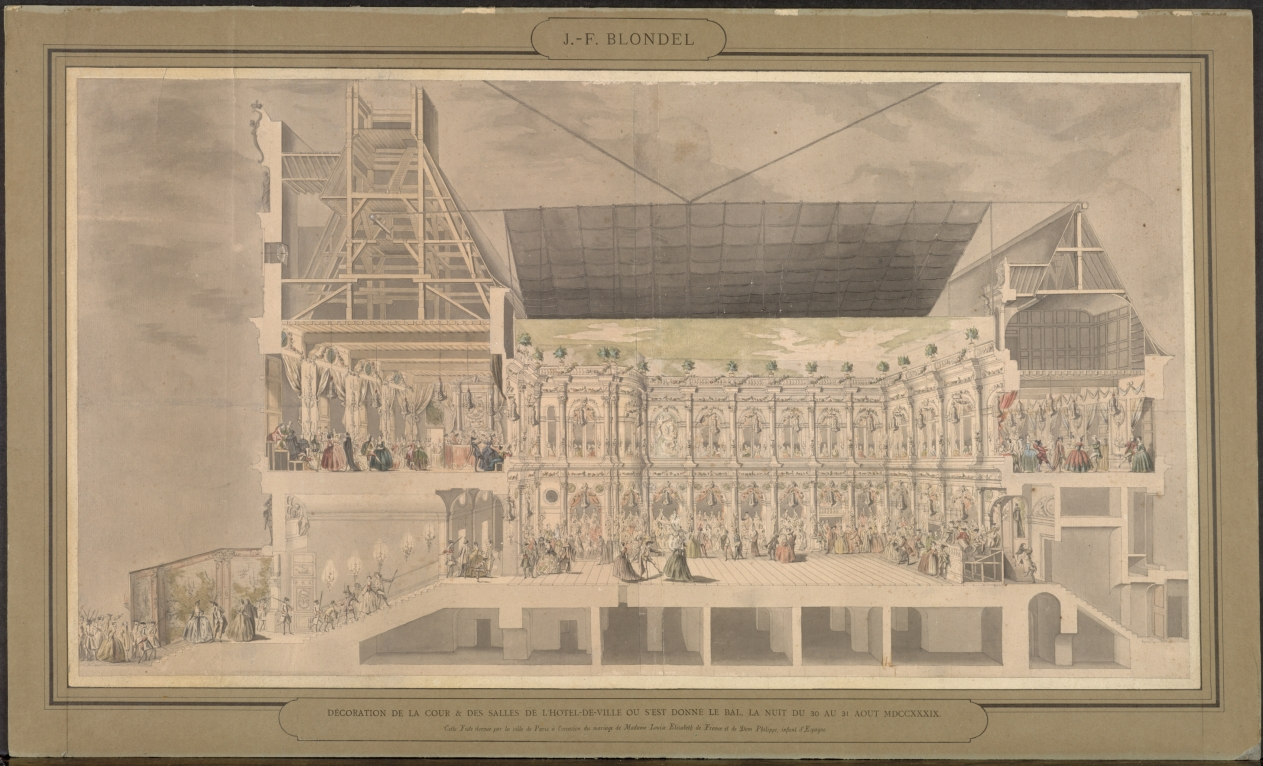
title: Cross Section of the Hôtel de Ville Seen in Perspective Showing the Decoration and Illumination of the Courtyard and Rooms Created on the Occasion of the Ball Given the Night of August 30 and 31, 1739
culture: France, 18th century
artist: Jacques-François Blondel (French, 1705–1744)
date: 1739–1740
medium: pen and black ink, brush and gray wash, and watercolor with gouache, over graphite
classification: Drawing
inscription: upper center in black: J. F. BLONDEL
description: This cross-section of a building allows a unique view into a French royal wedding. The partiers are dressed in costume and dance in the Parisian town hall. No expense was spared in the lavish celebration, from flowers to drinks to the elaborate false ceiling painted to look like the sky.